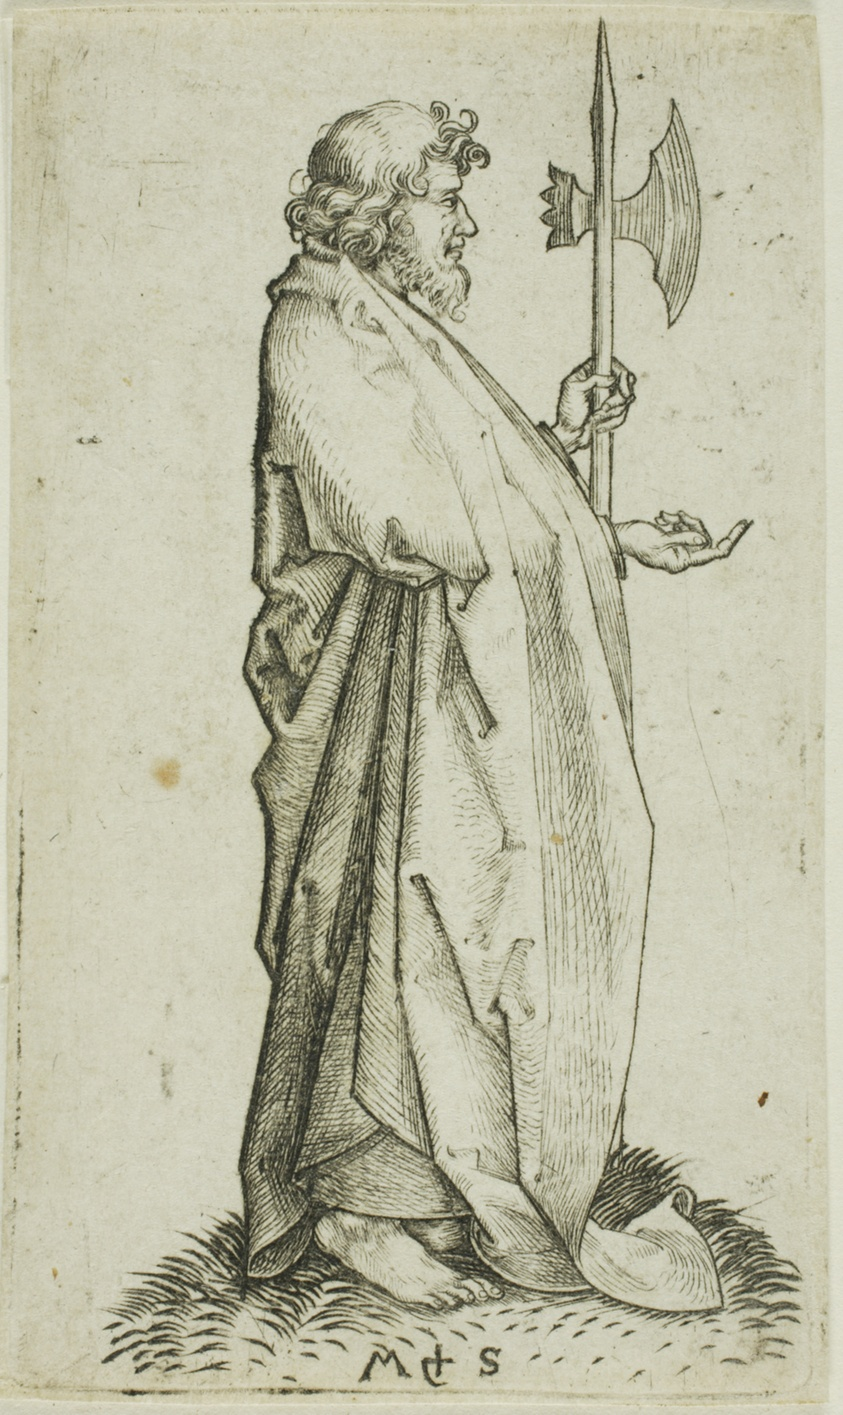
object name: Print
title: St. Matthias, from Apostles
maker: Martin Schongauer (German, c. 1430/50-1491)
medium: Engraving on paper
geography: Germany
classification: engraving; print; prints and drawing